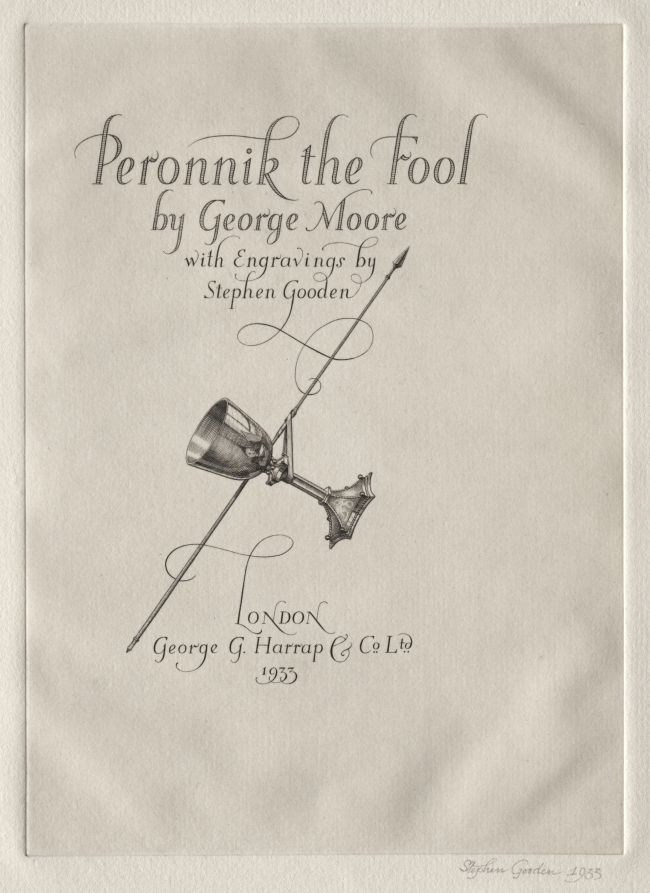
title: Illustration for "Peronnik the Fool": Peronnik the Fool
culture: England, 20th century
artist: Stephen Gooden (British, 1892–1955)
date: 1933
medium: engraving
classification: Print